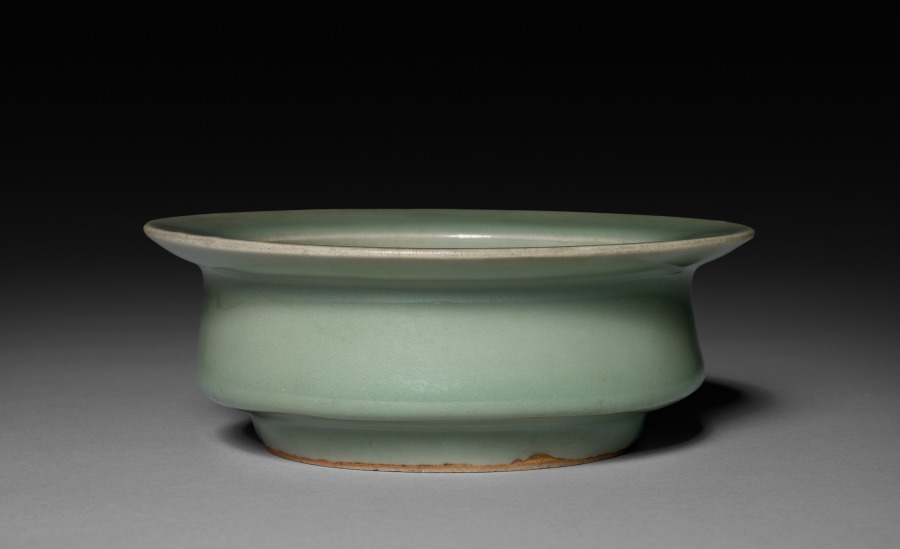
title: Brush Washer: Longquan Ware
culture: China, Southern Song dynasty (1127-1279)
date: 13th Century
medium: glazed porcelain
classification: Ceramic